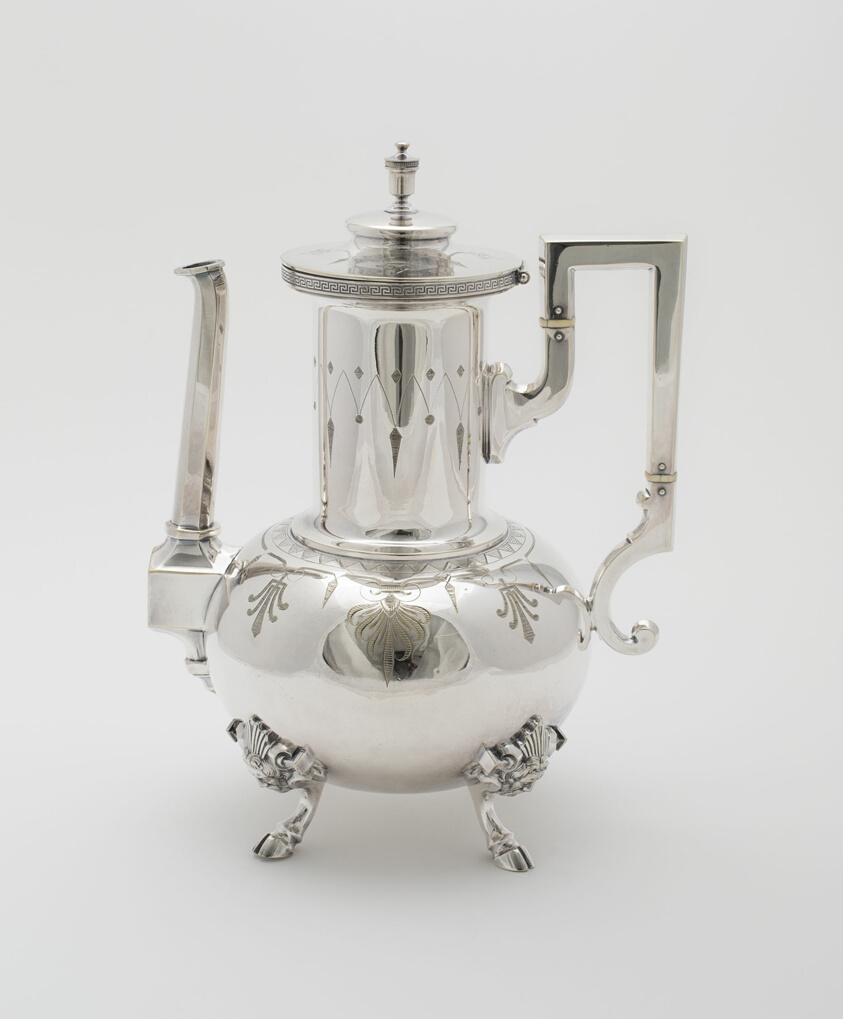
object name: Metalwork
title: Coffee Pot, part of Tea and Coffee Service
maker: Rogers, Smith, and Company (American, 1862–c. 1900); Meriden, Connecticut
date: 1878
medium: Silver with ivory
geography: Connecticut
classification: tea service; coffeepot; decorative arts